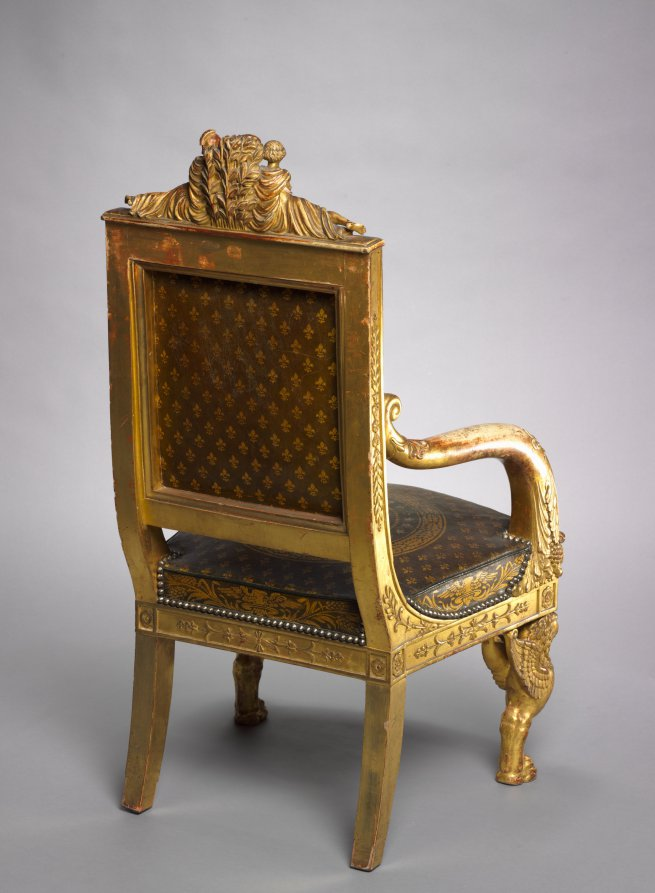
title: Child's Throne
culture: France, Paris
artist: Pierre-Marie Balny le Jeune (French, 1832)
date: 1822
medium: carved and gilded wood, leather upholstery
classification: Furniture and woodwork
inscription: inscribed with stencils inside back rail: BLONDEL TAPISSIER/RUE ST. ANTOINE N 72 1822 inscribed in ink lower edge back rail: 12 JANVIER 18[22?]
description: This chair was made for the young, presumed successor to the French throne who ruled briefly as Henri V in 1830, the last of the direct Bourbon line. He is depicted at the center of the top rail protected by female figures representing France and Minerva, the Roman goddess of wisdom. Fleurs-de-lis and the Gallic rooster, symbols of French royalty and the French people, decorate the upholstery.